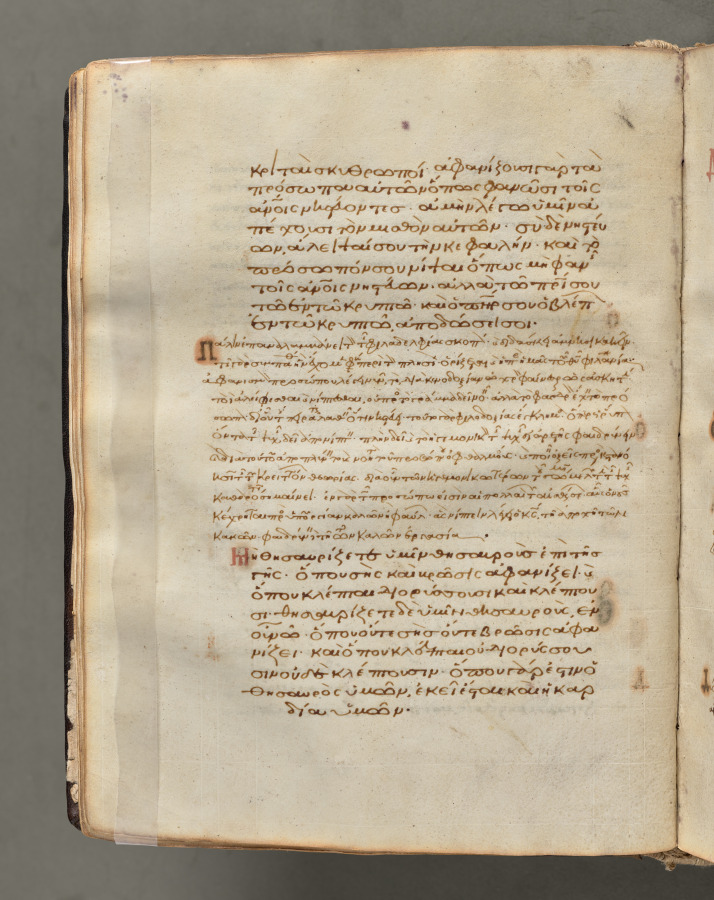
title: Text, folio 26 (verso), from a Gospel Book with Commentaries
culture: Byzantium, Constantinople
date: c. 1000–1100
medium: ink, tempera, and gold on vellum; leather binding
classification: Bound Volume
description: Each of the four gospels in this book opens on a page with brilliantly illuminated borders depicting the author of the text as well as birds—principally peacocks, symbols of the immortality of the soul—and fountains, representing the fountain of life and the salvation of the soul. This volume consists of 428 leaves with texts in Greek. Its level of sophistication suggests that it was probably written and decorated in a monastery in Constantinople.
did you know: Gospel books were carried in procession through Byzantine churches.